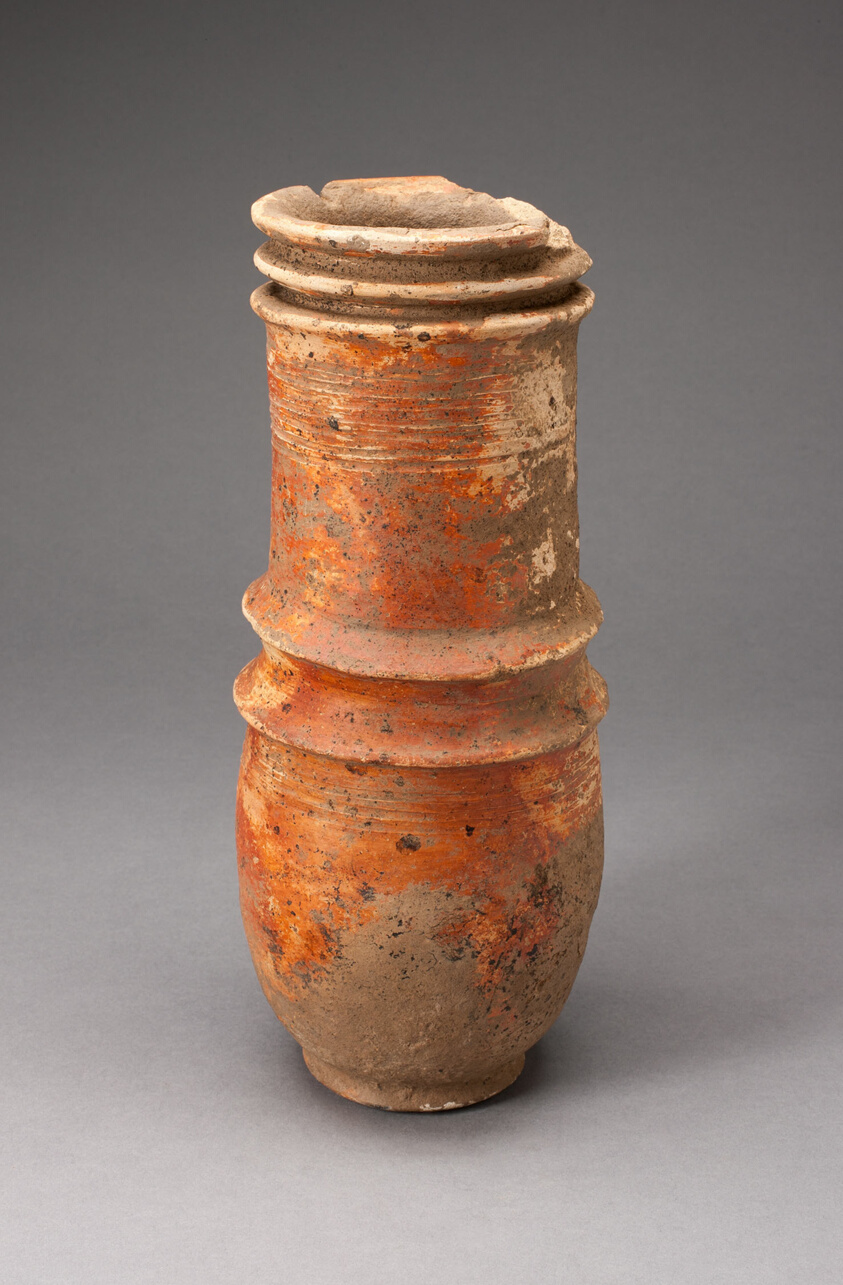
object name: Vessel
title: Ritual Vessel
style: mali kingdom, Arts of Africa, Northern Africa and the Sahel, african Art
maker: Inland Niger Delta region, Mali; Northern Africa and the Sahel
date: 12th /17th century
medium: Terracotta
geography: Mali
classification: earthenware; arts of Africa; ceramics; vessel; african art; ritual objects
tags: vessels, ritual